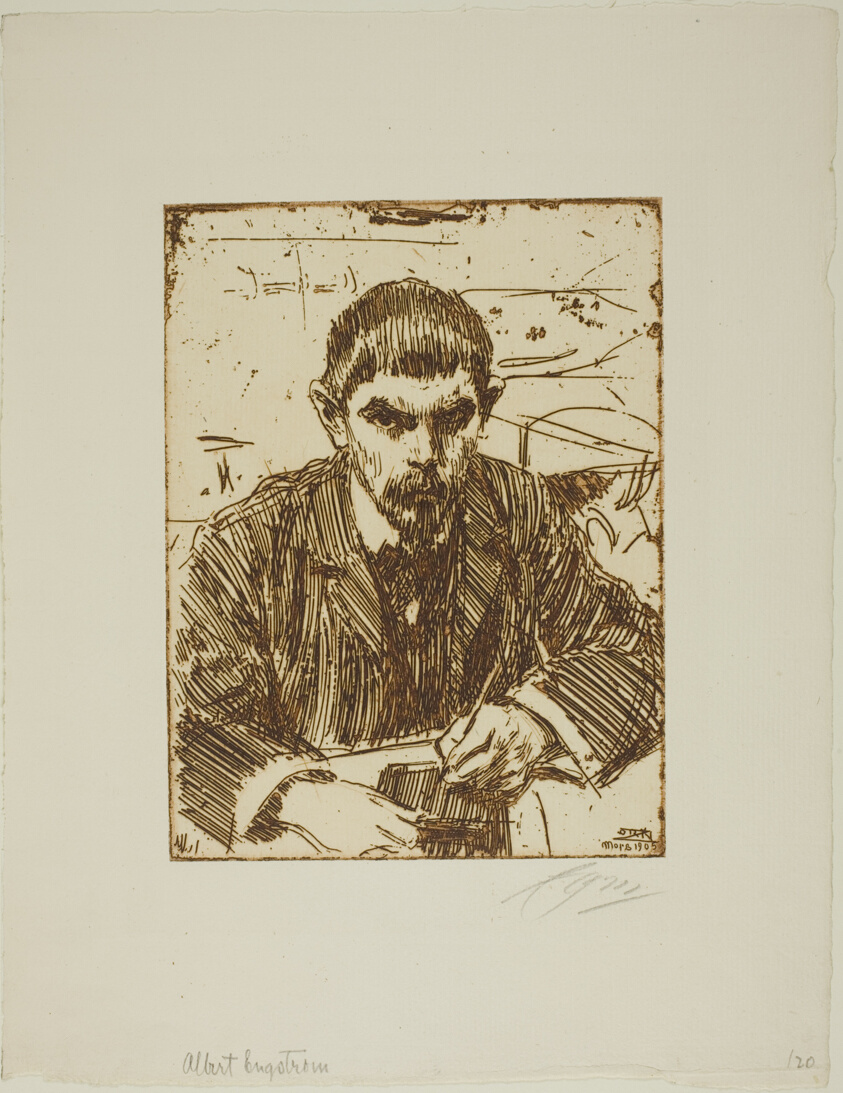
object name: Print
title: Albert Engström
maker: Anders Zorn (Swedish, 1860-1920)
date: 1905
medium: Etching printed in reddish brown ink on ivory laid paper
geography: Sweden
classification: etching; print; prints and drawing